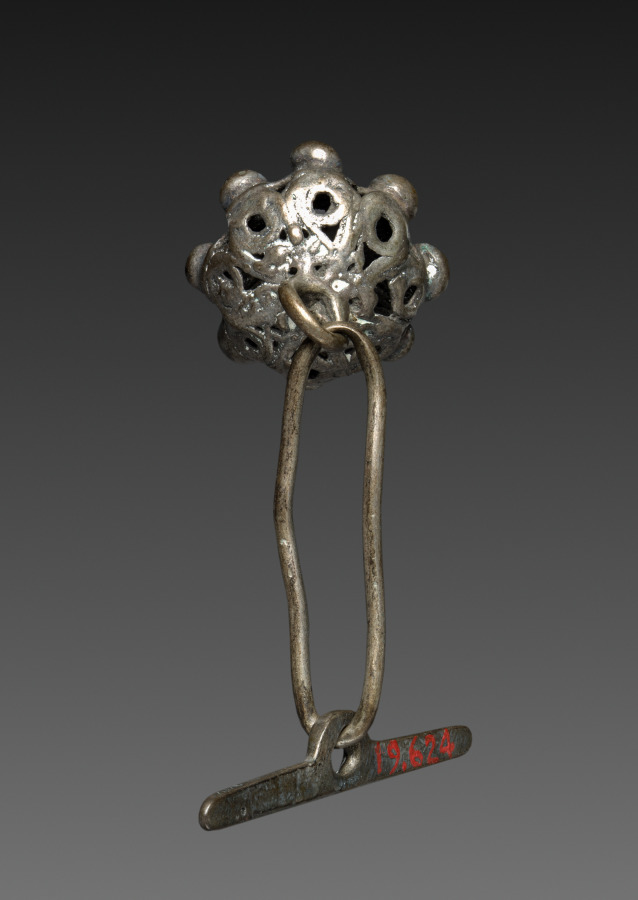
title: Button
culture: Italy, Sardinia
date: 1800s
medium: silver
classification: Jewelry